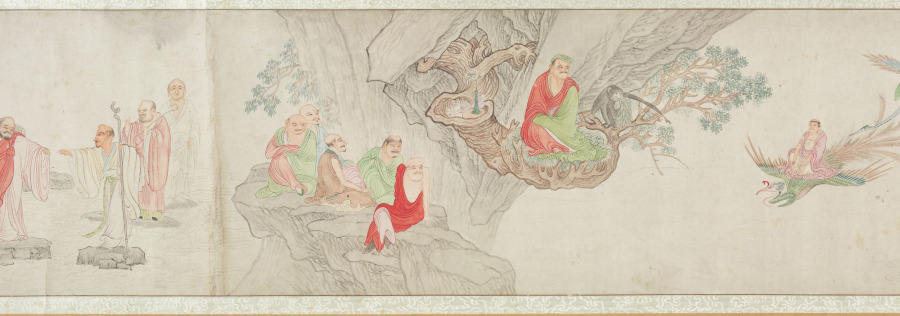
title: The Five Hundred Arhats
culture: China, Ming dynasty (1368–1644)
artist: Wu Bin (Chinese, active c. 1591–1626)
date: 1591–1626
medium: Handscroll; ink and color on paper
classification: Painting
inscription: 枝隱頭陀吳彬齋心拜寫 [印]吳彬之印; 文中父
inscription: 7 seals of Qianlong emperor (r. 1736–95): Gu xi tian zi 古希天子; Shou 壽; Qianlong jian shang 乾隆鑑賞; San xi tang jing jian xi 三希堂精鑑璽; Yi zi sun 宜子孫; Tai shang huang di zhi bao 太上皇帝之寳; Qian qing gong bao 乾清宮寶.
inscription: 6 seals of Cheng Qi 程琦 (1911–1988): Ke an geng zi wu shi yi hou suo de ming ji 可菴庚子五十以後所得名跡; 5 other Cheng Qi seals.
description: More than 66 feet long, this handscroll depicts 447 luohans, 72 attendants, and the bodhisattva of compassion at its very end. Luohans (arhats in Sanskrit), disciples of the Buddha and protectors of the Buddha’s law, possess supernatural powers and take on myriad external appearances. The amusing assortment of characters are engaged in an array of religious, secular, and miraculous activities. The painter used stylistic features borrowed from earlier artists, carefully controlled lines, and refined coloring. Wu Bin was a lay Buddhist and depicting this sort of image was part of a religious practice seeking understanding of the Buddha’s teaching.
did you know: Far advanced on the path to enlightenment, arhats have the capacity to tame tigers, free dragons, and to float on water or in the air.